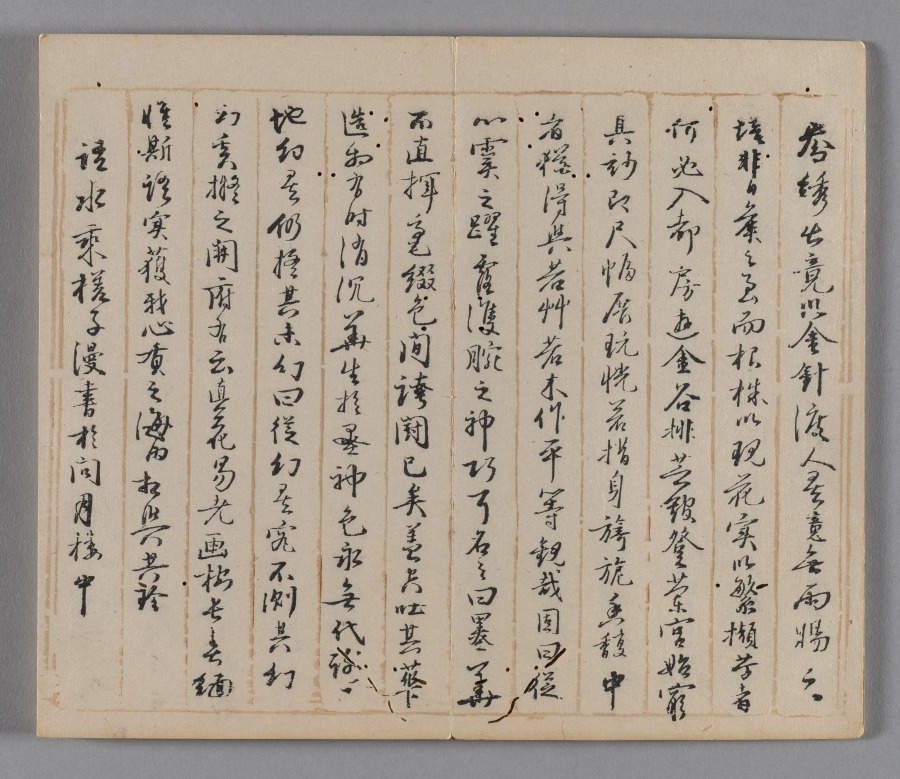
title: Ten Bamboo Studio Collection of Calligraphy and Painting: Round Fans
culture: China, Qing dynasty (1644-1911)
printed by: Hu Zhengyan (Chinese, c. 1584–1674)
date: 1633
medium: Woodblock-printed book; ink and colors on paper; first edition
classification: Print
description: Color printing reached a level of perfection in the early 1600s, as seen in this Ten Bamboo Studio Collection of Calligraphy and Painting and the Mustard Seed Garden Manual of Painting (printed 1679 and 1701). The painterly quality, precision in registering (aligning) the woodblocks, and harmonious colors made them the most successful color print editions in Chinese history. Both editions were printed and compiled in Nanjing, spread nationwide, and had a great impact on the arts in Japan and Korea.